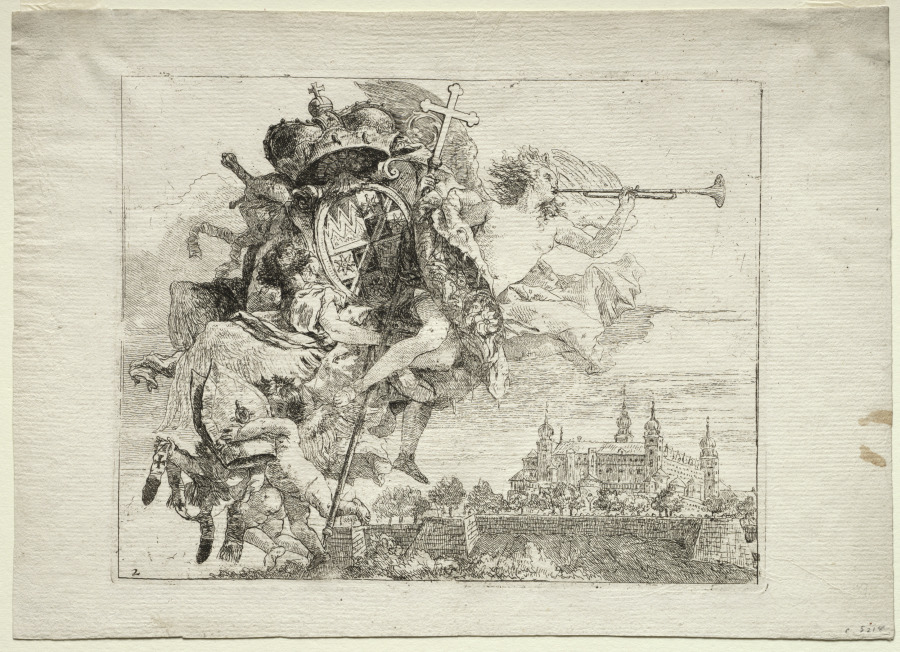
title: Flight into Egypt: Dedication with Winged Figure of Fame bearing the Arms of the Prince-Bishop of Wurzburg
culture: Italy, 18th century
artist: Giovanni Domenico Tiepolo (Italian, 1727–1804)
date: 1750–53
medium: etching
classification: Print